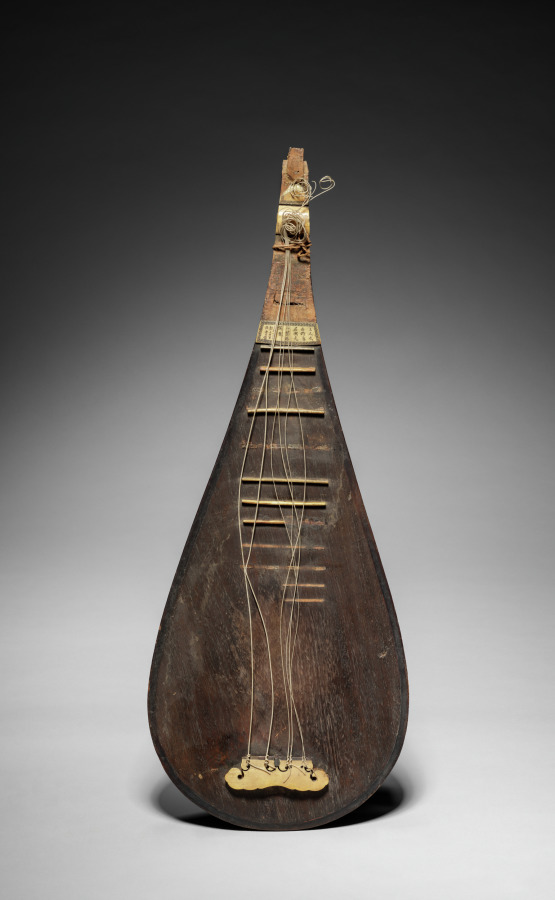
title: Liuxian Pipa (Six-String Pipa)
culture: China, Qing dynasty (1644-1911)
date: 1800s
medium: wood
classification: Musical Instrument